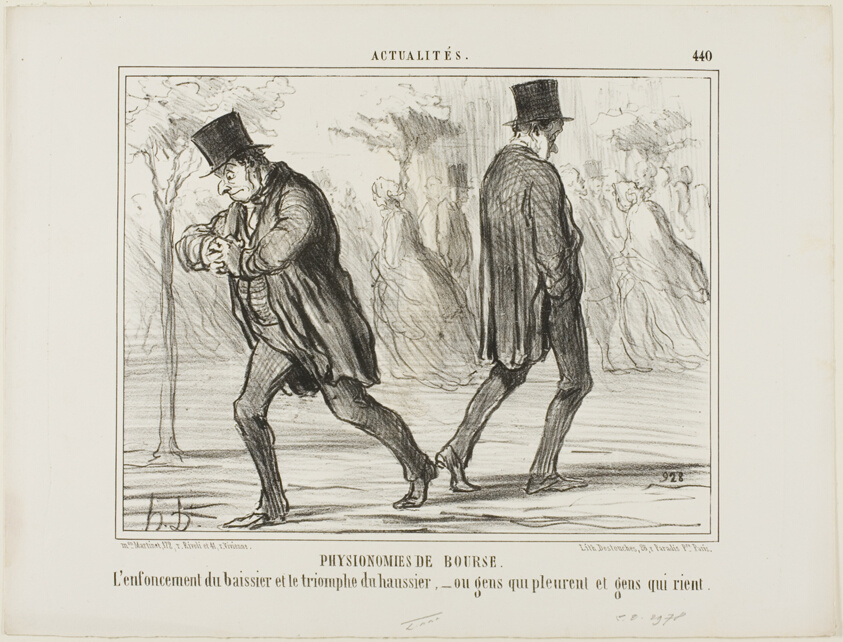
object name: Print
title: Physiognomy of the Stock Exchange. The despair of the baissier and the triumph of the haussier - or crying and laughing, plate 440 from Actualités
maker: Honoré Victorin Daumier; French, 1808-1879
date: 1857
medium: Lithograph in black on white wove paper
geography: France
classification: lithograph; print; prints and drawing